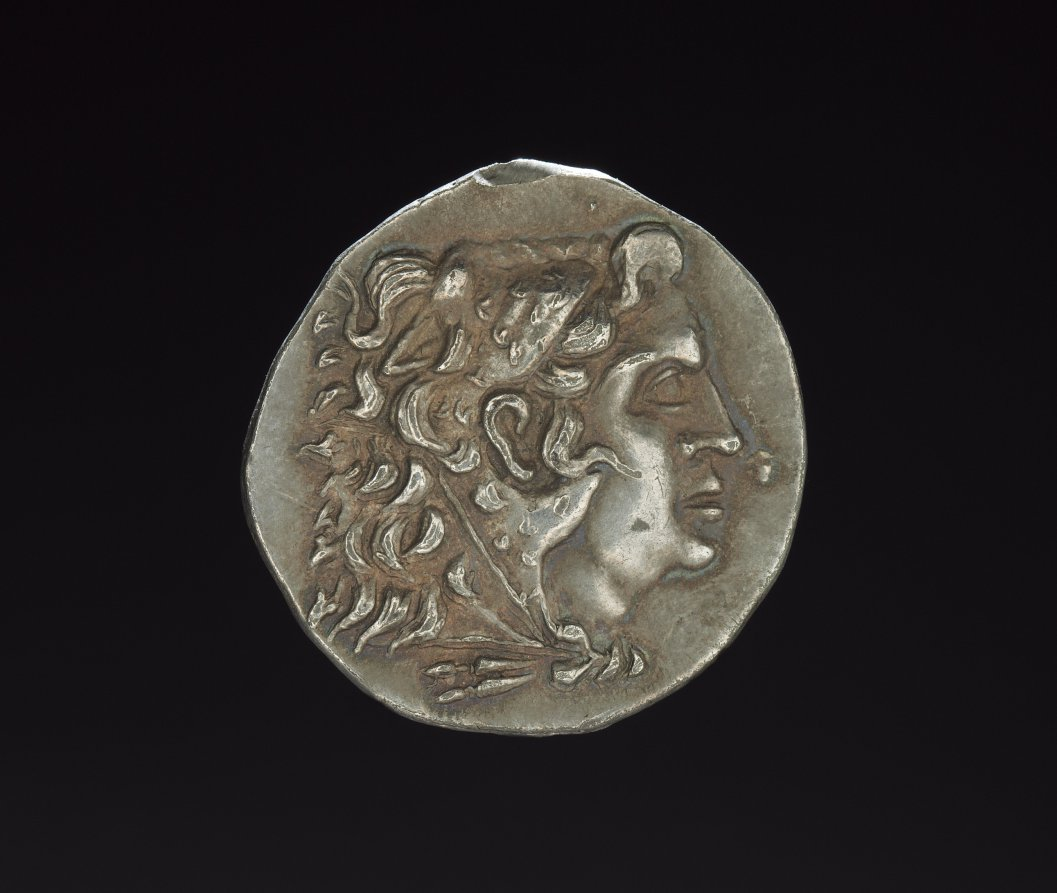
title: Indo-Greek Coin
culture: Afghanistan, Bactria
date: c. 200–1 BCE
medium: silver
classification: Silver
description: After Alexander of Macedon succeeded in conquering Egypt and Persia in 331 BC, his ambition to rule the known world led him further east across Bactria in Afghanistan, through the Hindu Kush mountain pass, and into India. There he succeeded in defeating all the local kings of the region until his men, on the brink of mutiny, insisted that they return to Greece. Alexander left governors in charge of his territories, and after his death in 323 BC, his governors became independent kings, establishing Hellenistic cities and a Greek cultural base in the region, which lasted for almost 200 years. The posthumous portrait of Alexander on the front of this coin depicts him wearing the lion scalp. He identified with Hercules, the mortal who became a god as a result of his superhuman feats, including the defeat of the Nemean lion.